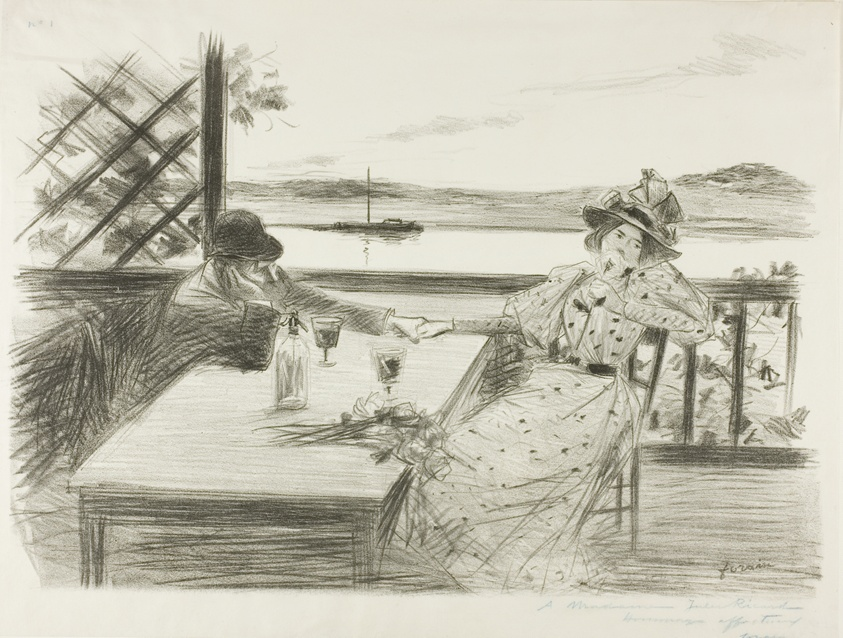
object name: Print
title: The Arbor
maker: Jean Louis Forain (French, 1852-1931)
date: 1893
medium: Lithograph on ivory wove paper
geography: France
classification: lithograph; print; prints and drawing